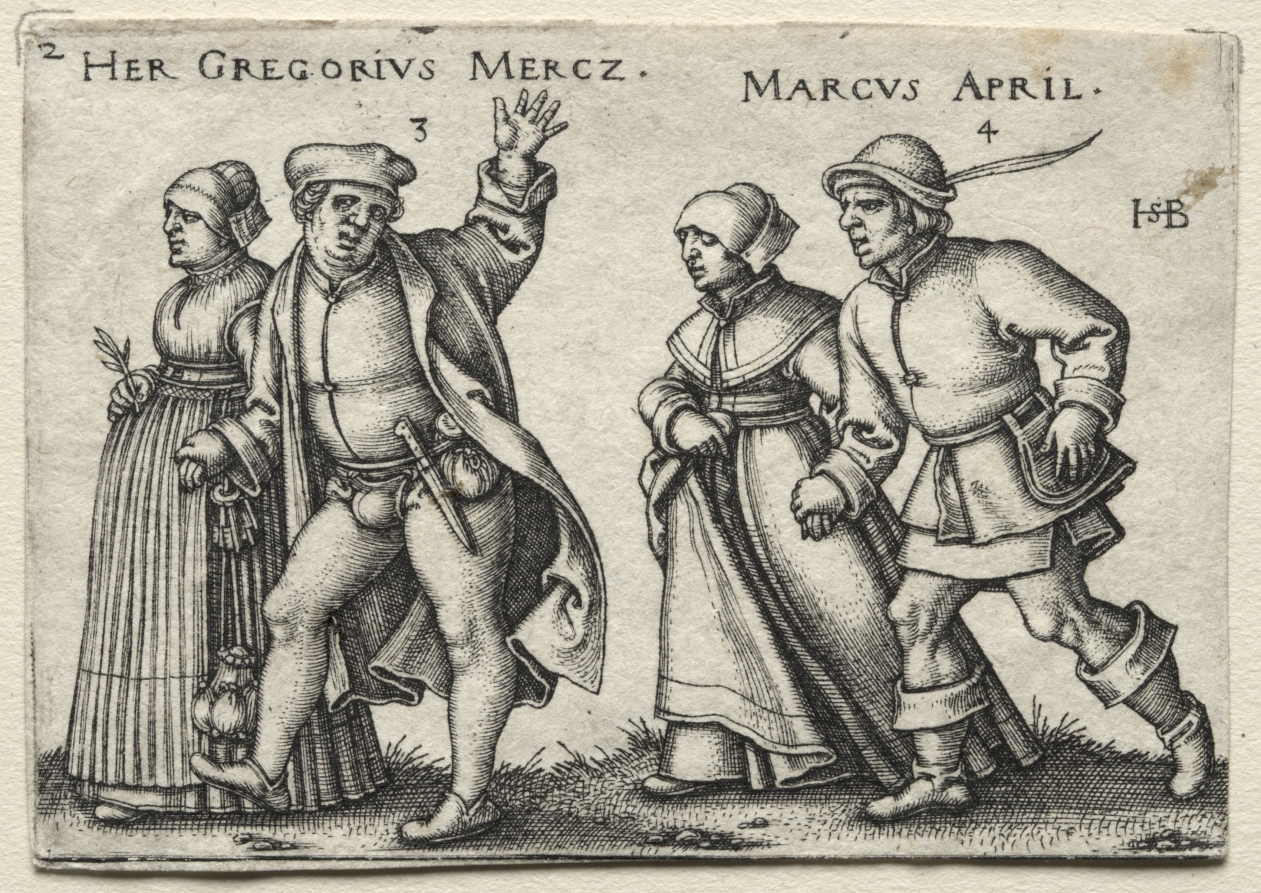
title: The Village Wedding: Her Gregorius Mercz / Marcus April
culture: Germany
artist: Hans Sebald Beham (German, 1500–1550)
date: 1546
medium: engraving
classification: Print